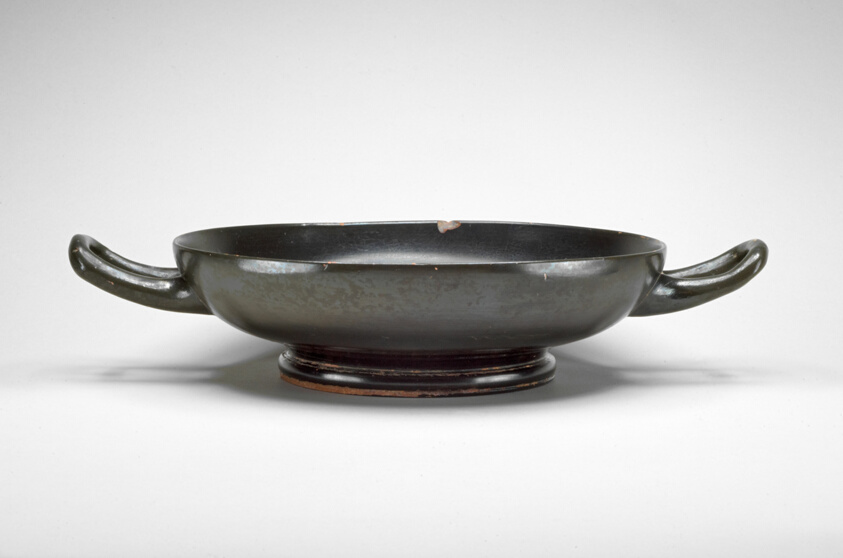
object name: Vessel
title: Stemless Kylix (Drinking Cup)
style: greek, ancient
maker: Greek; Athens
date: 460-450 BCE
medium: terracotta, black-glaze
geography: Cales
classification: drinking vessel; vessel; ancient art; container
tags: dining, drinking